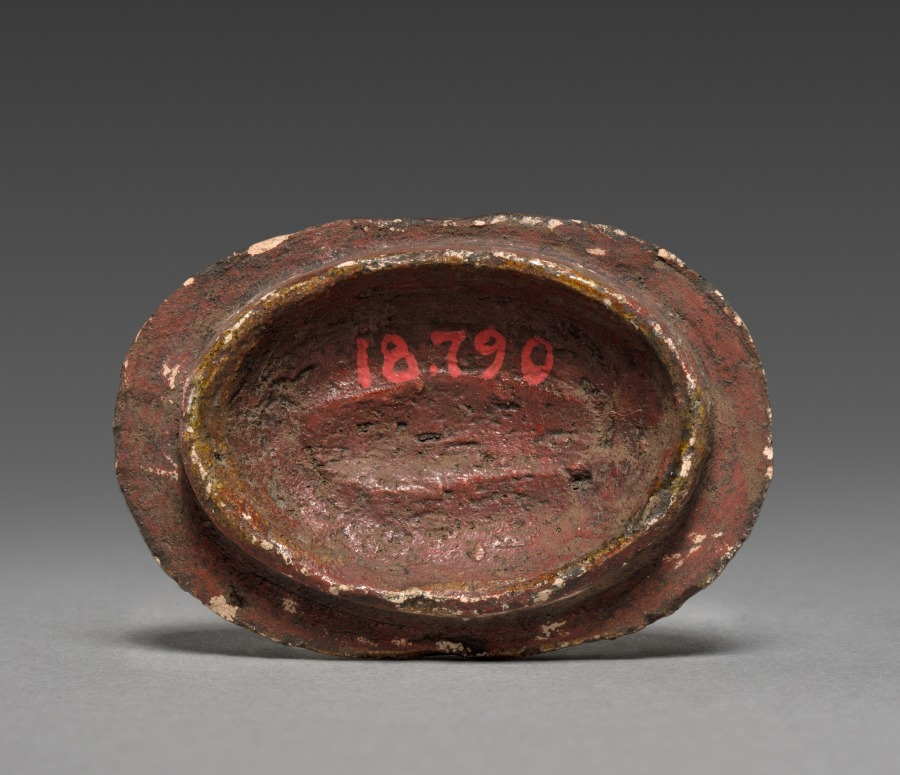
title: Box of Incense Container (Kōgō) in the Shape of a Bird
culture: Japan, Edo period (1615–1868)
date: c. 1700–1868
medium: pottery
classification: Ceramic